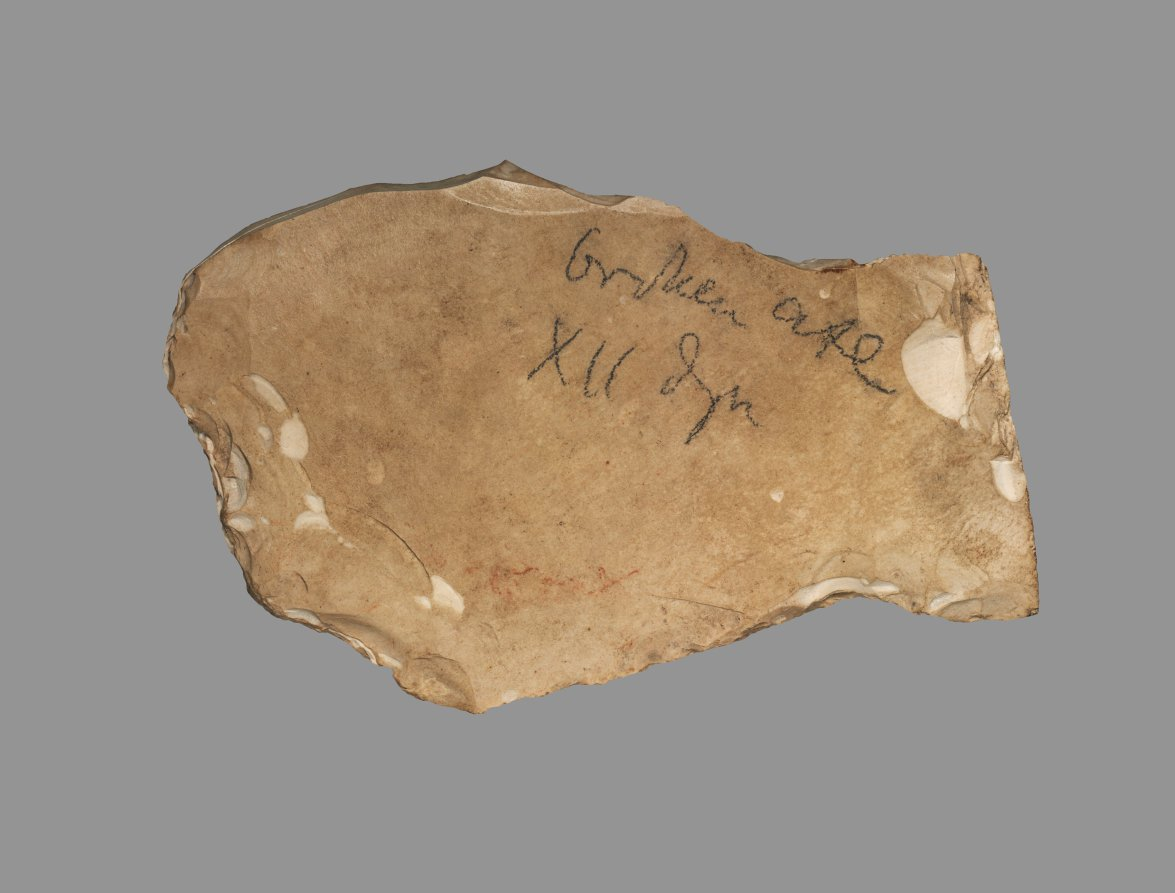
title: Ax Head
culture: Egypt, Haraga, excavated in 1914, Middle Kingdom (2040–1648 BCE), Dynasty 12, reign of Senusret III (1878–1839 BCE)–Dynasty 13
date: 1886–1648 BCE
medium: flint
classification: Implements